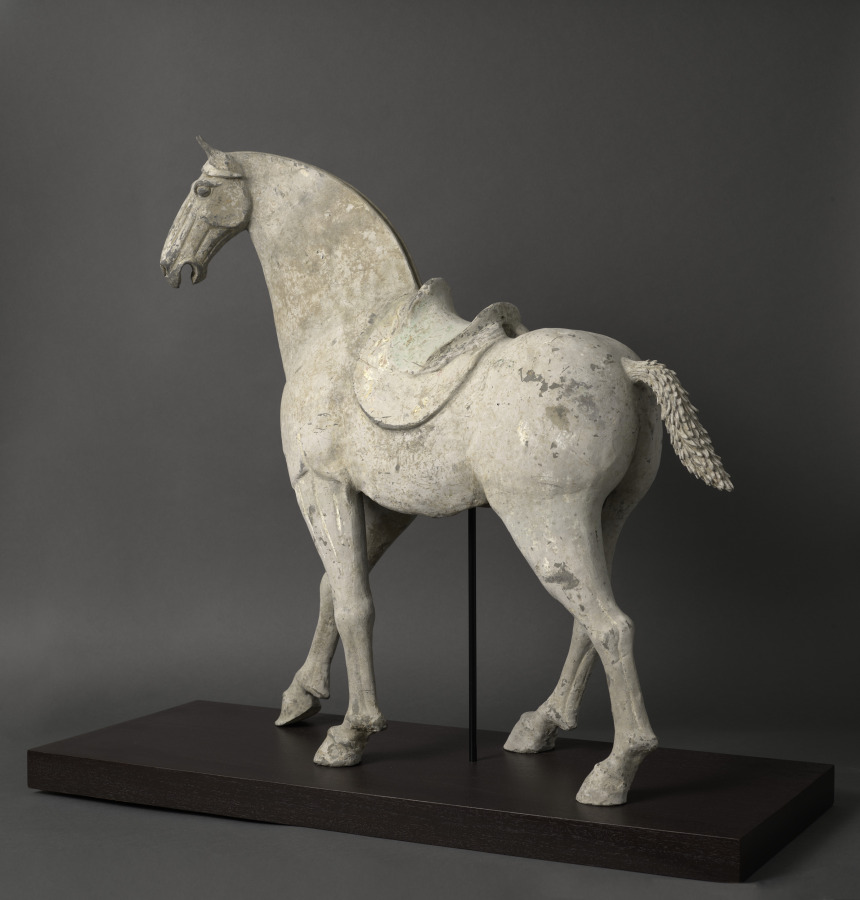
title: A Large Painted Striding Horse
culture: China, Tang dynasty (618–907)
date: 700–800s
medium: Pottery with white slip and mineral colors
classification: Ceramic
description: Horses were symbols of status and power in ancient China, used for military operations, mobility, and entertainment for the elite. Around the second century BCE onward, pottery horses began to be placed in tombs as status symbols and companions of the deceased in the afterworld. This horse is harnessed with a saddle and is exceptionally large. It presents a well-bred specimen that strides forcefully ahead.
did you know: A groove runs over the horse’s neck from its ears to the saddle, indicating that its mane and tail were once filled with real horsehair to render the sculpture more realistic.